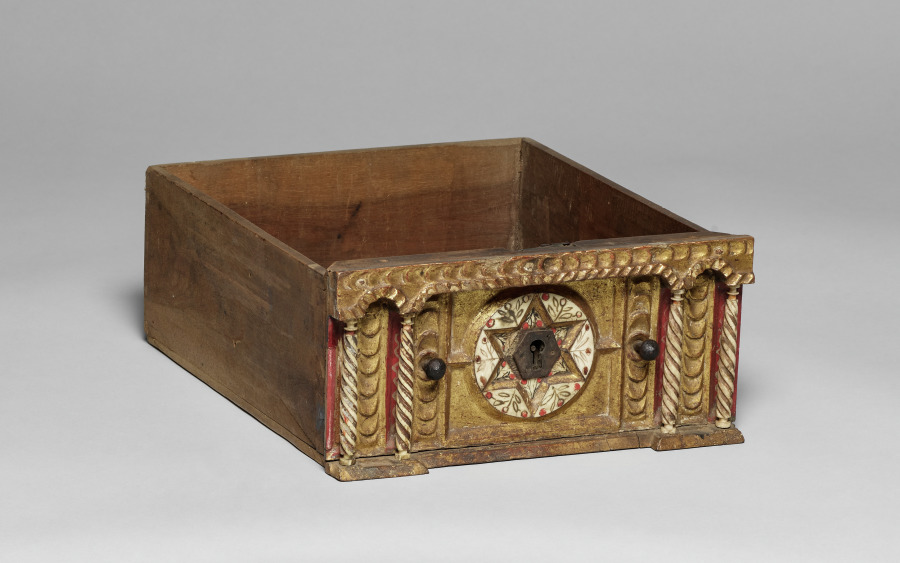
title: Chest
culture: Spain, Colonial, late 17th Century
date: late 1600s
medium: turned and joined wood, gilded and painted red with applied bone columns and bone inlays, wrought iron hardward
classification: Furniture and woodwork